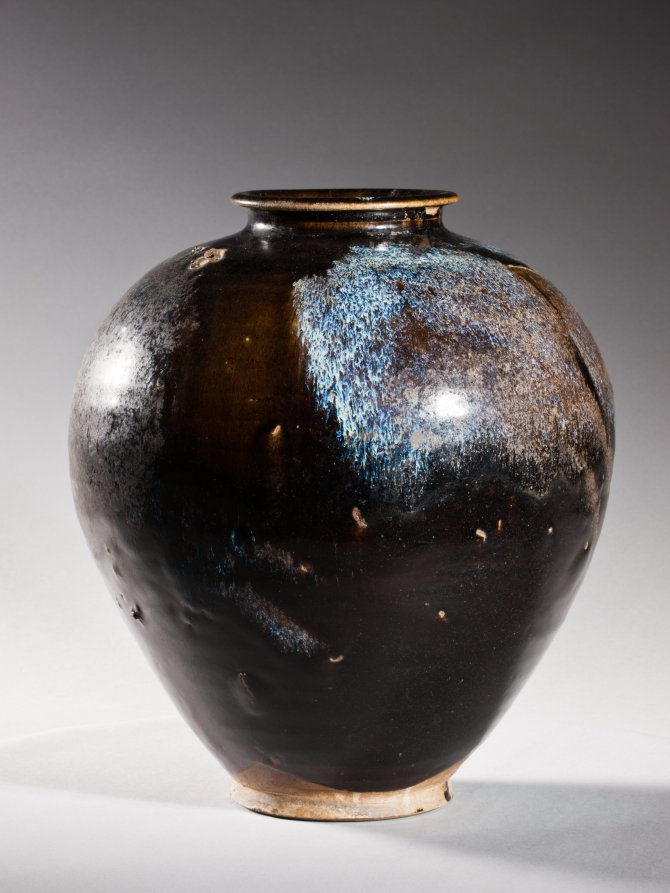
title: Jar: Black Ware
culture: China, Henan province, Huangdao kilns, Tang dynasty (618-907)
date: 700s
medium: glazed stoneware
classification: Ceramic